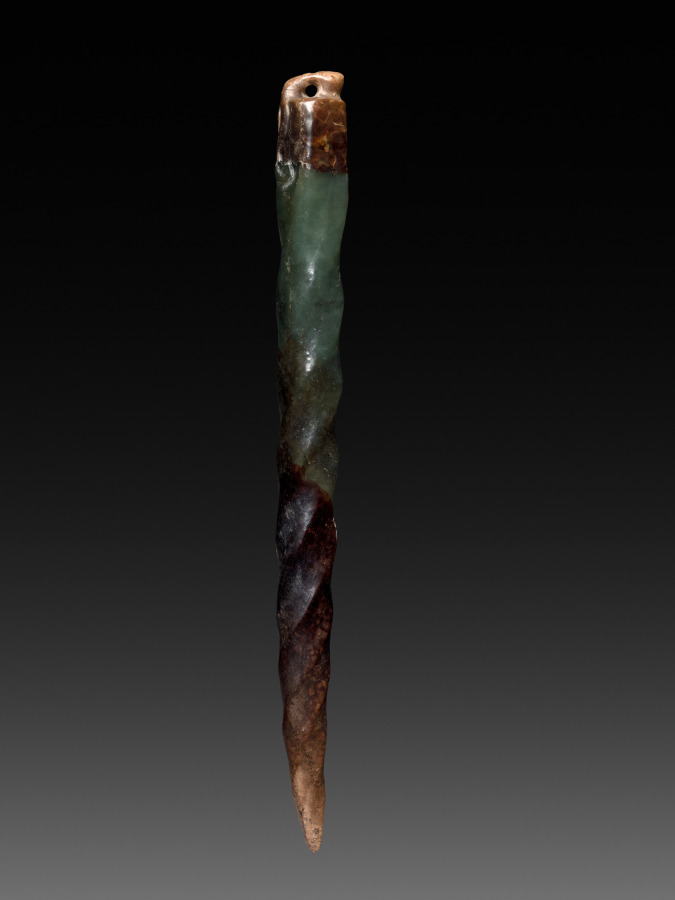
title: Knot Picker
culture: China, Tang dynasty (618-907)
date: 618–907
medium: jade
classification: Jade